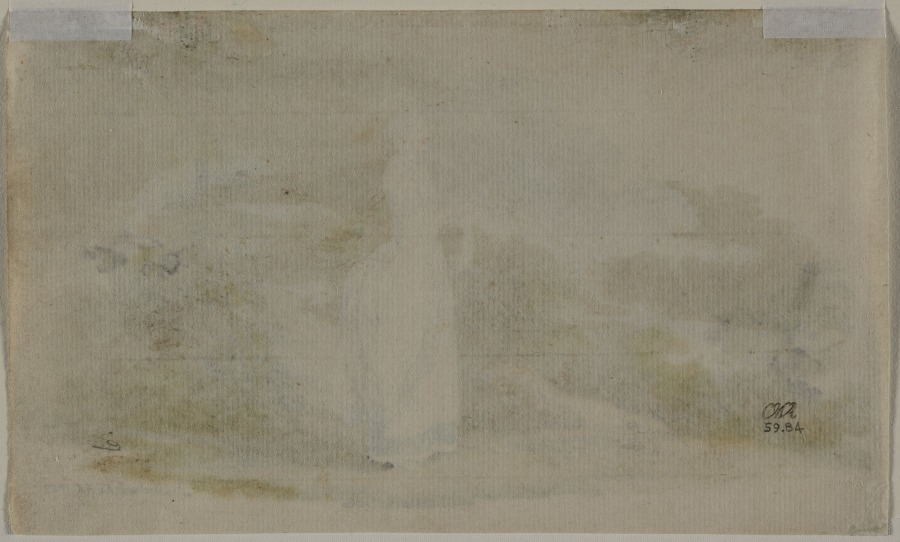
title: Susanne (The Artist's Daughter at the Age of Twenty-One)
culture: Germany, 18th century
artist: Daniel Chodowiecki (German, 1726–1801)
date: 1782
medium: pen and black ink, watercolor and gouache over graphite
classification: Drawing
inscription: signed, lower right, in gray wash: D. Chodowiecki del. 1782 ; VERSO, lower left, in graphite: 6. (sideways)